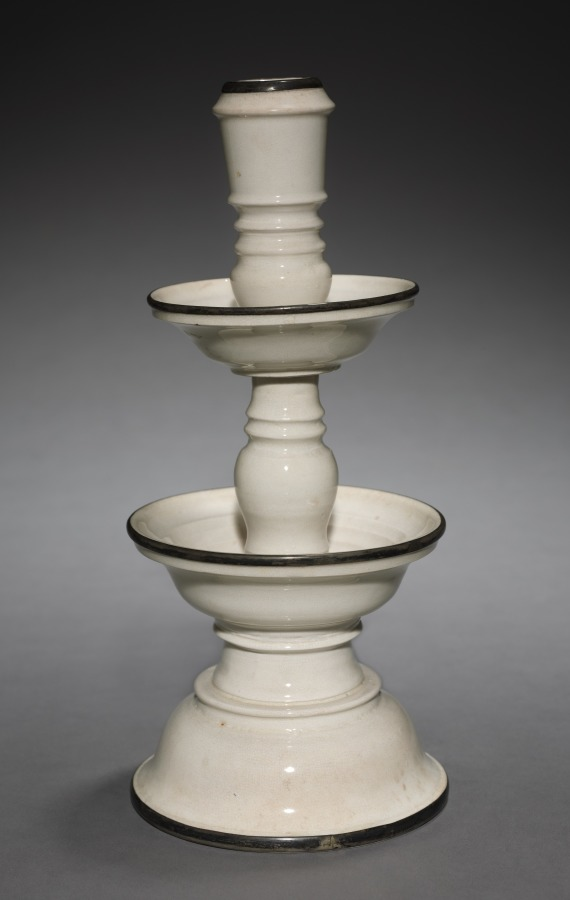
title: Candlestick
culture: China, Ming dynasty (1368–1644)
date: 1600s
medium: glazed porcelain with metal rims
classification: Ceramic